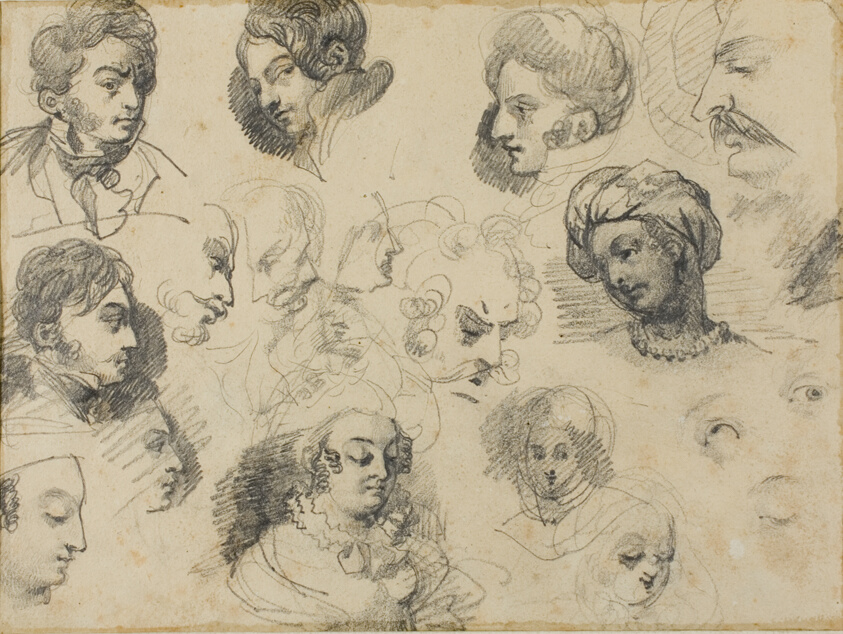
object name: Drawing and Watercolor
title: Sketches of Heads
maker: Jean Louis André Théodore Géricault (French, 1791-1824)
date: 1813/14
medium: Graphite, on tan wove paper, perimeter mounted on ivory laid paper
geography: France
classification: graphite; drawings (visual works); prints and drawing